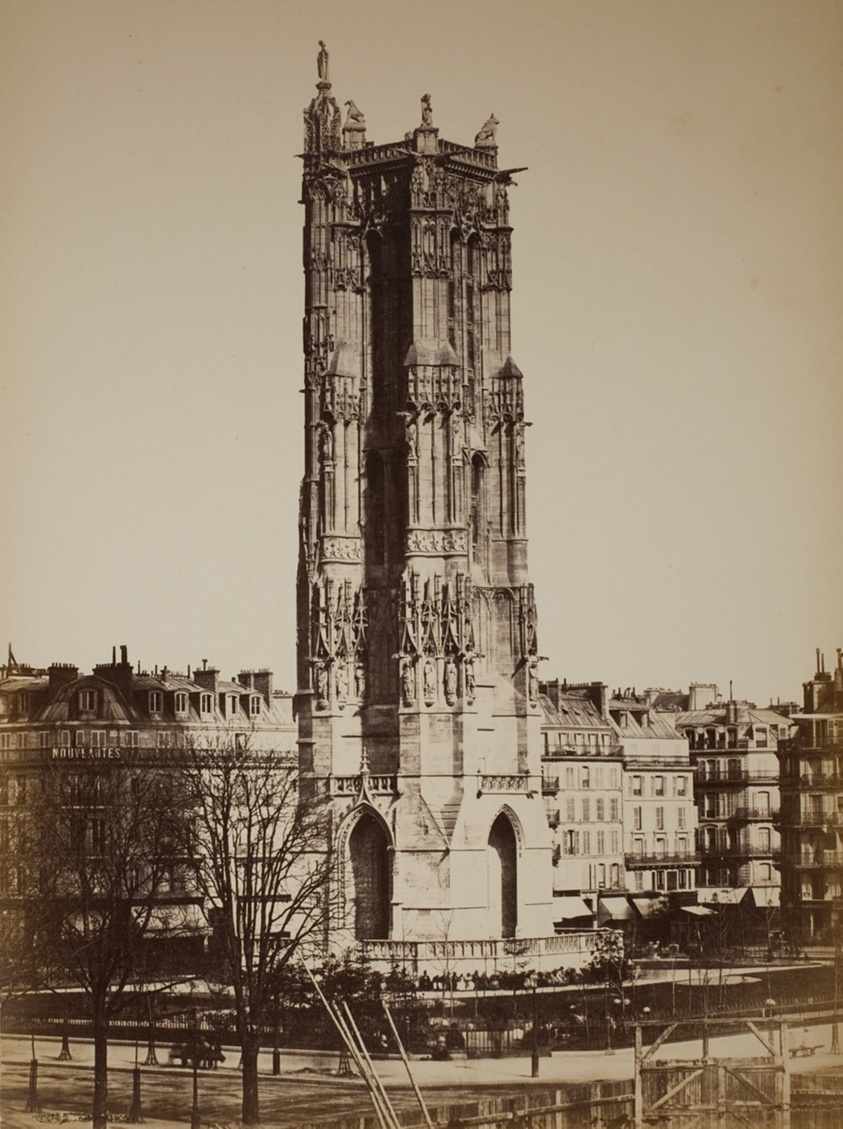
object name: Photograph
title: Tour St. Jacques, Paris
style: 19th century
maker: Artist unknown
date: 1860s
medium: Albumen print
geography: Ville de Paris, Départment de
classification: photograph; albumen silver print; photography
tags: Paris